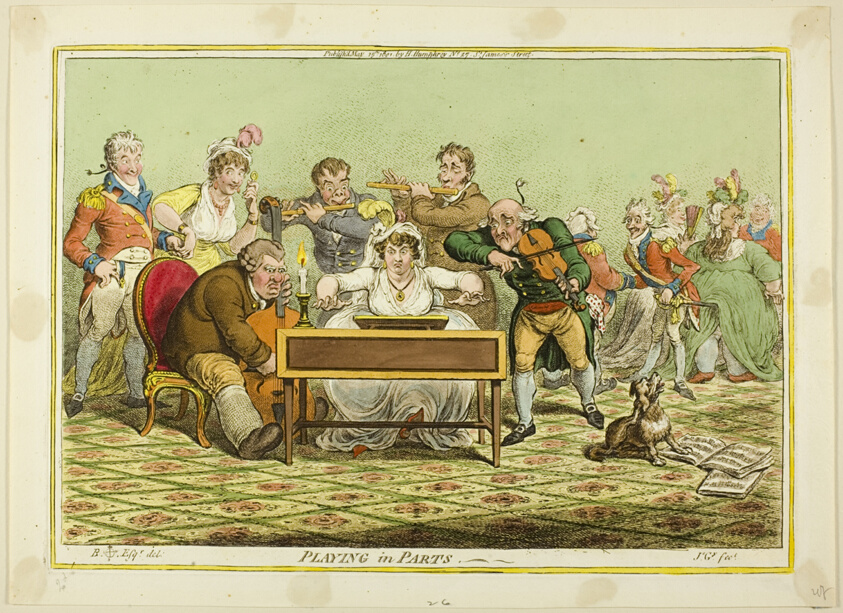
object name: Print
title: Playing in Parts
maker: James Gillray (English, 1756-1815); after Brownlow North (English, 1778-1829)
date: published May 15, 1801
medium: Hand-colored etching and aquatint on paper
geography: England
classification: etching; print; prints and drawing